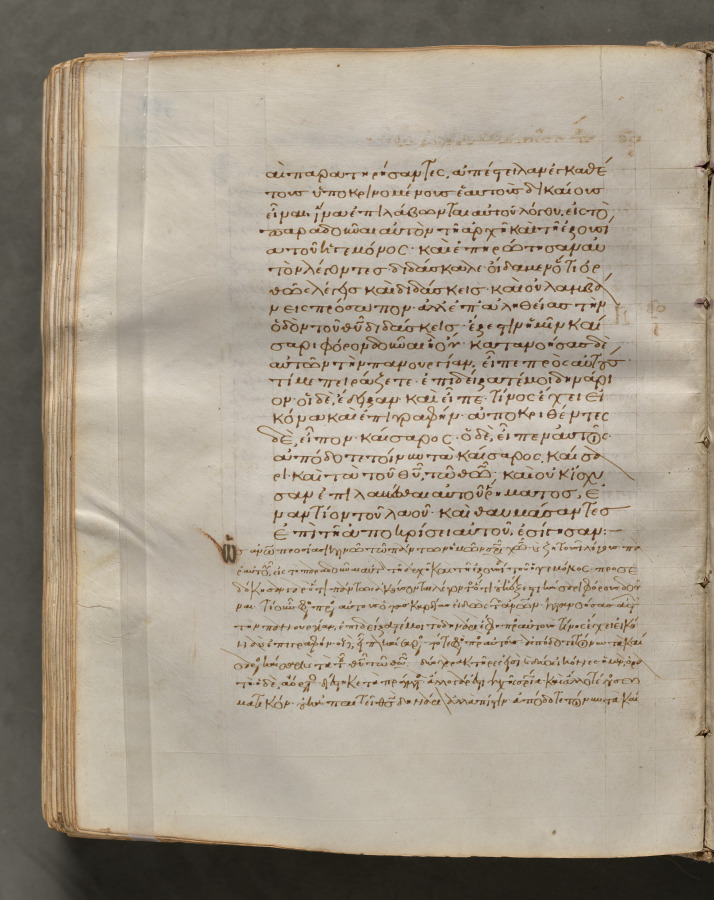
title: Text, folio 301 (verso), from a Gospel Book with Commentaries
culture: Byzantium, Constantinople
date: c. 1000–1100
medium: ink, tempera, and gold on vellum; leather binding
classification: Bound Volume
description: Each of the four gospels in this book opens on a page with brilliantly illuminated borders depicting the author of the text as well as birds—principally peacocks, symbols of the immortality of the soul—and fountains, representing the fountain of life and the salvation of the soul. This volume consists of 428 leaves with texts in Greek. Its level of sophistication suggests that it was probably written and decorated in a monastery in Constantinople.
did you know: Gospel books were carried in procession through Byzantine churches.